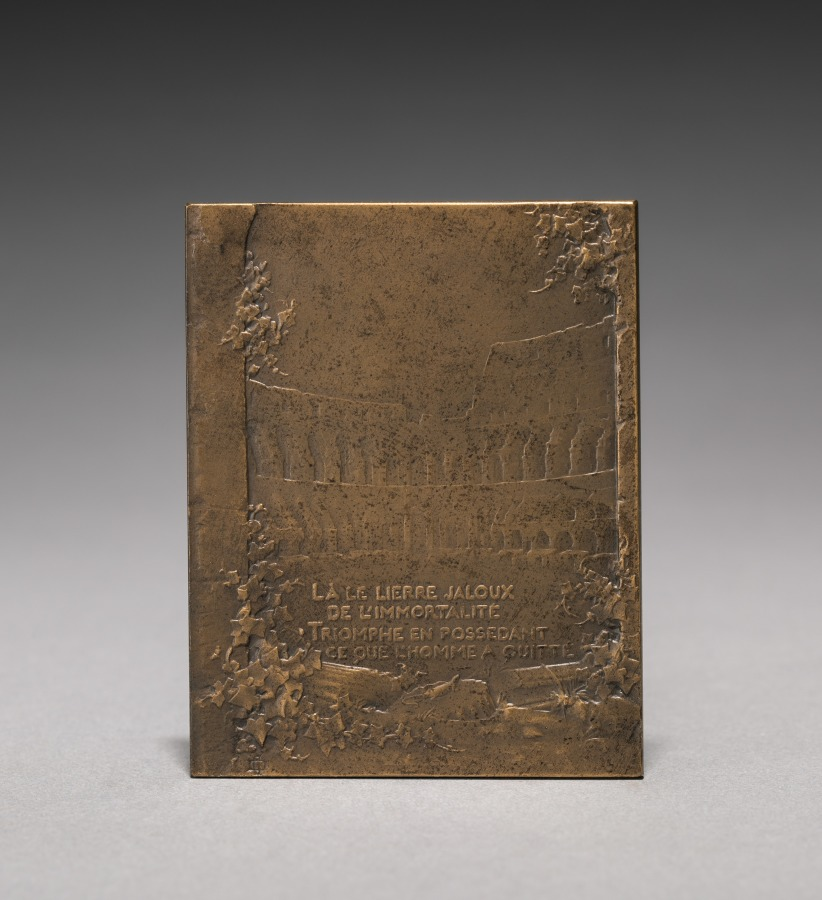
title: Medallion (reverse)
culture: France, 19th-20th century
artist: Jules Dupré (French, 1811–1889)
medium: bronze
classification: Metalwork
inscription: "La le lierre jaloux de l'immortalite triomphe en possedant ce que l'homme a quitte" (There the ivy, jealous of immortality triumphs in possessing that which man has left).